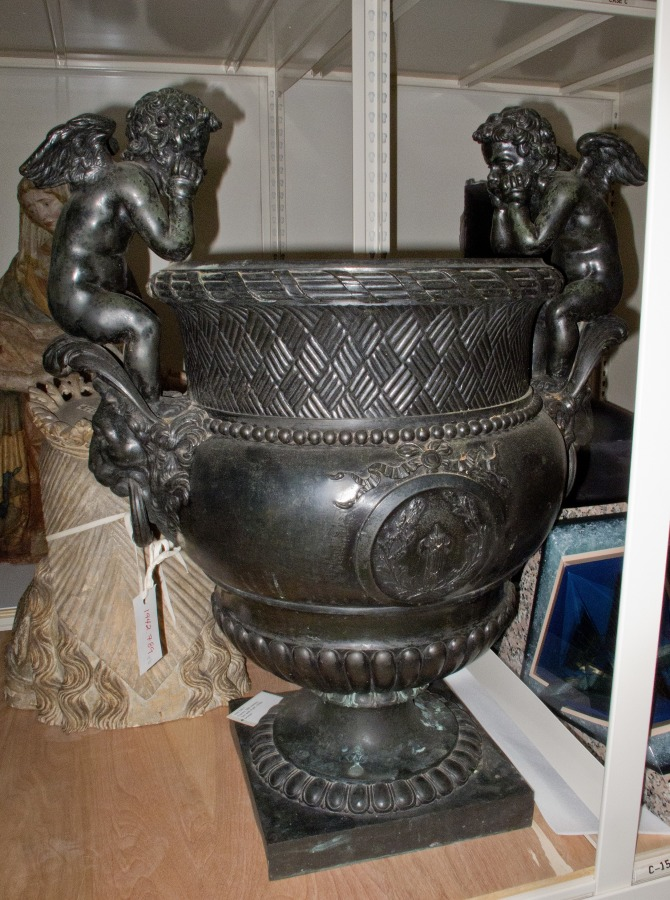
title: Pair of Urns with Putti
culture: France, 18th century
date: 1700s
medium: bronze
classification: Metalwork